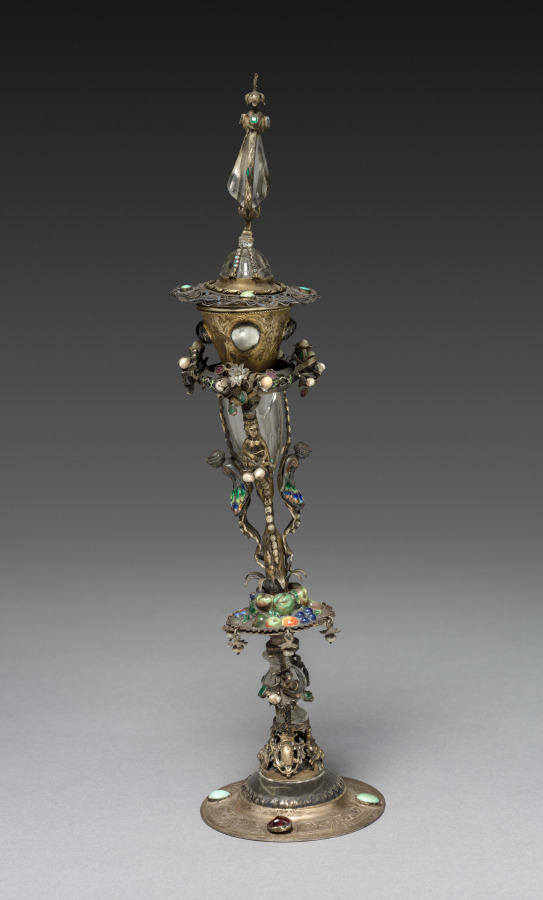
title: Blood Reliquary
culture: Italy (?), 16th century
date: 1500s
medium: gilt silver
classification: Metalwork